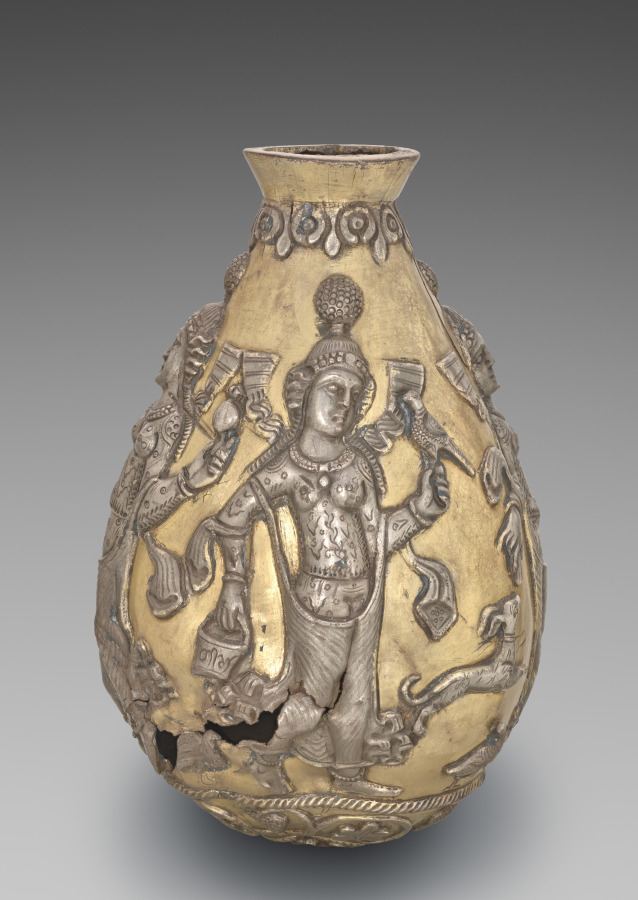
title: Anahita Vessel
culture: Iran, Sasanian Empire (224–651 CE)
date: 300–500 CE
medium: silver, cast, raised, repoussé, chased, and gilted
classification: Metalwork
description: These dancers may be sacred images of the Zoroastrian religion of the Sasanians or they may be bacchantes, followers of a cult of the Roman wine god, Bacchus, who was popular in the Near East.